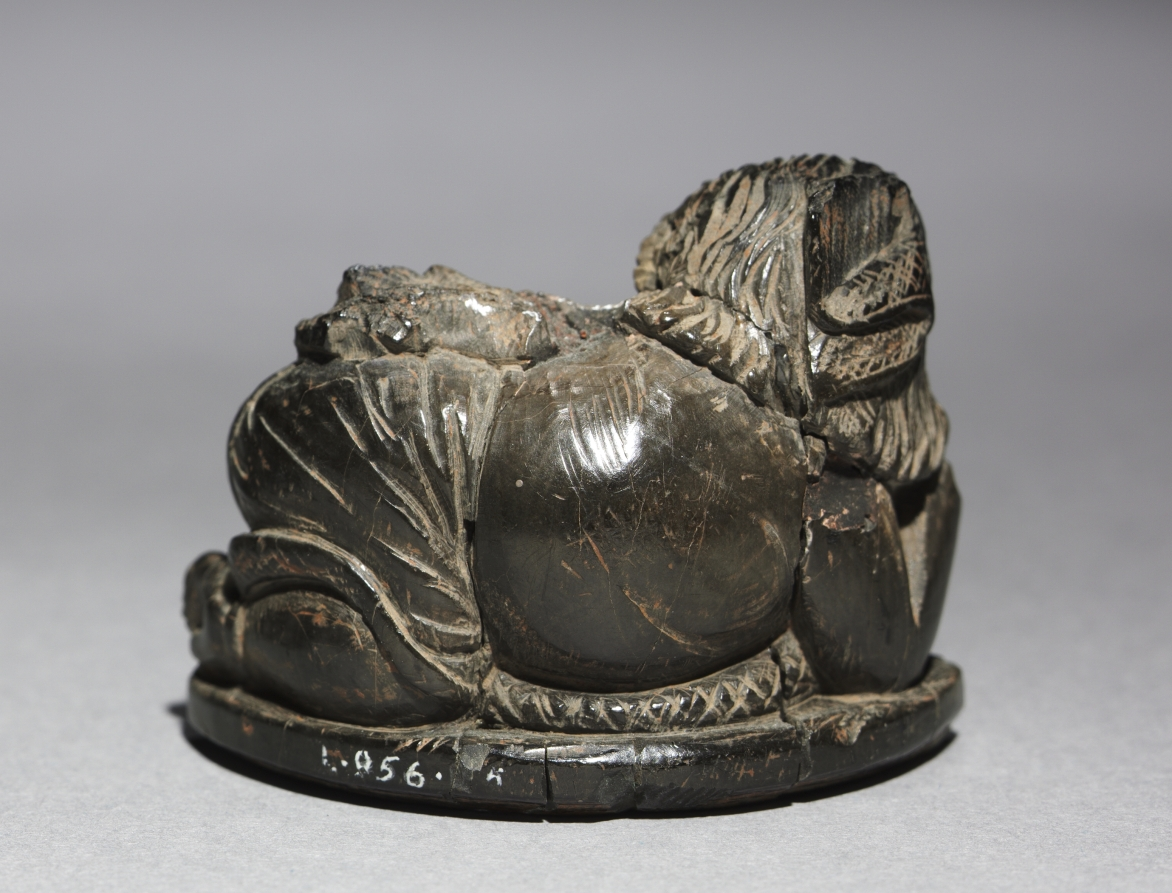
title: Figurine of a Crouching Woman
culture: Phoenicia, Syria, Arslan Tash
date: 900–800 BCE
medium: ivory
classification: Ivory